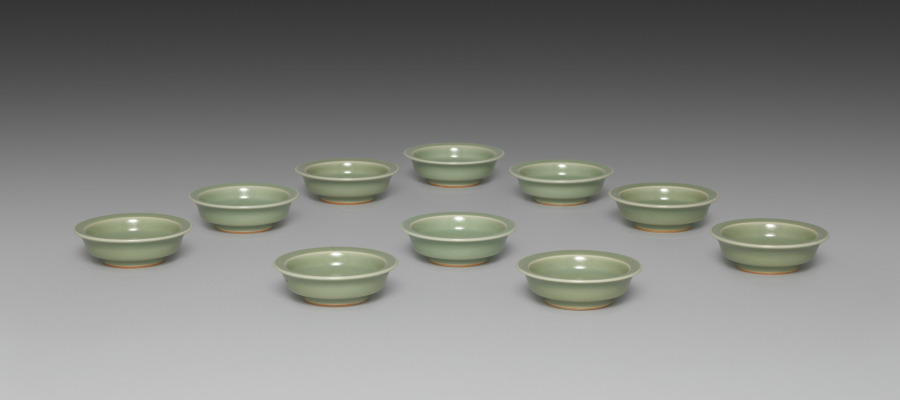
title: Saucers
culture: Japan, Meiji period (1868–1912)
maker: Seifū Yohei III (Japanese, 1851–1914)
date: 1893–1914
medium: Set of ten saucers; porcelain with green glaze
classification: Ceramic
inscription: 清風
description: Yohei III’s main output for his sophisticated clientele was in the form of tea sets and dining sets. He created a range of dishes in green glazes. He often produced in pairs, sets of five, or sets of ten. For this set of ten small dishes in a simple, round form that emphasizes the glaze above all, the box lid designates the piece as seiji, or green-glazed porcelain, using a general term for the extensive palette of green glazes often called celadon in English. The box lid further identifies the dishes themselves as tōchō, literally “bean-sized saucers,” a size that makes them suitable for dipping sauces.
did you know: The ten dishes in this set are stored in stacks of five in a two-compartment box.